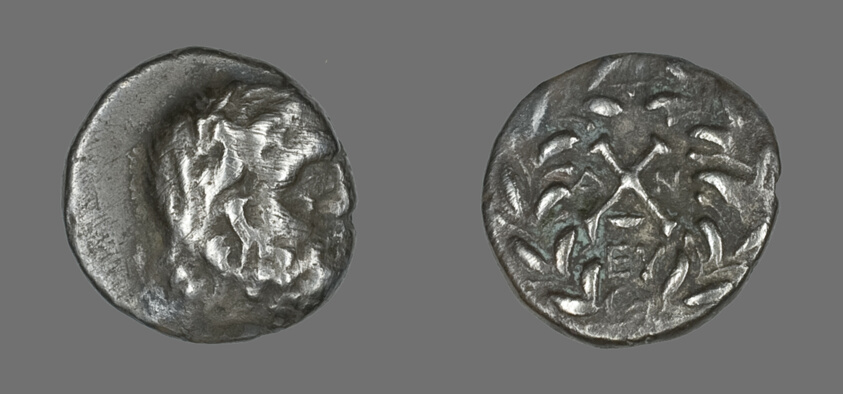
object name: Coin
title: Hemidrachm (Coin) Depicting the God Zeus Amarios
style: greek, ancient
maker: Greek; Antigoneia (once Mantineia)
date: 222-146 BCE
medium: Silver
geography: Ancient Greece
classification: coin; ancient art